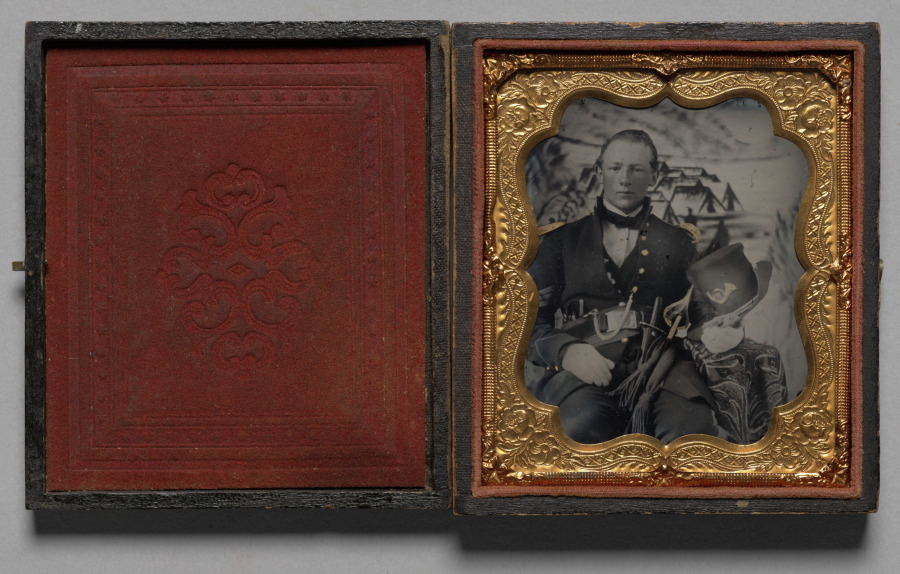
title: Civil War soldier with painted bivouac background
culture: America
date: c. 1861–65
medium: ambrotype, sixth plate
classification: Photograph